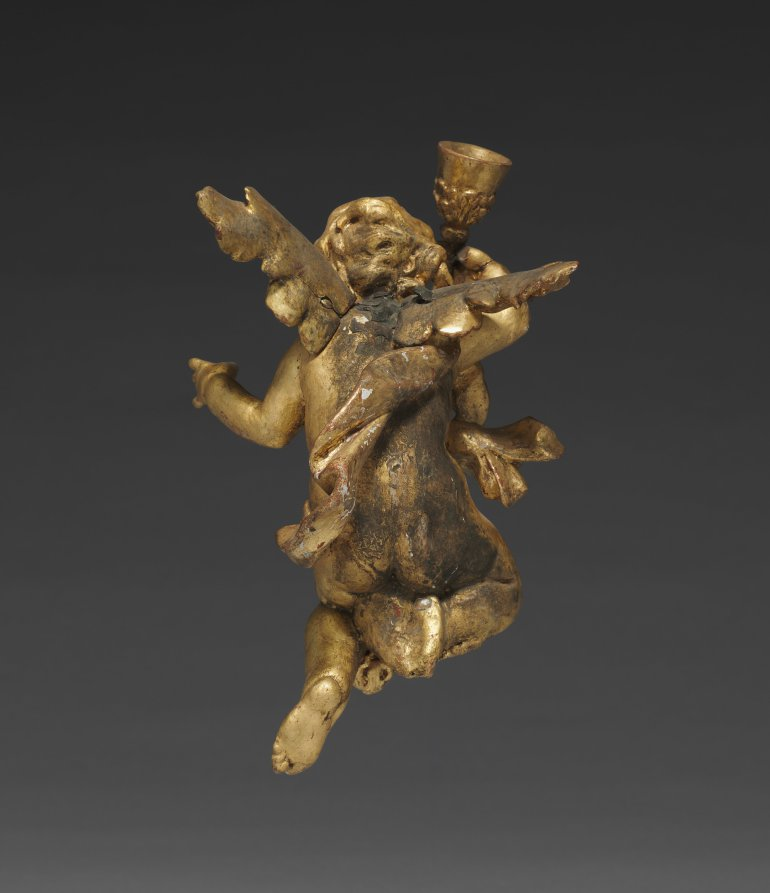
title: Altarpiece with Relics - Putto, middle right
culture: Germany, Bavaria, 18th century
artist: Joseph Matthias Götz (German, 1696–1760)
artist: and Workshop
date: c. 1735–40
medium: gilded wood, with relics in niches: gilded wood, mother-of-pearl, ebony, red silk, gold wire, seed pearls, rock crystal, pen and ink on paper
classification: Sculpture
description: Götz covers every surface in gold leaf, giving each part of the object equal importance, rather than simply framing a central picture. In this distinctively Central European approach, figural narrative is subordinate to the overall ensemble. Götz designed this object to rest on top of an altar, probably in front of a larger painted or sculpted decorative scheme. The work contains relics seen through the small windows on the perimeter. These small remains of holy figures demonstrate the persistence of a medieval Catholic tradition well into the 1700s.